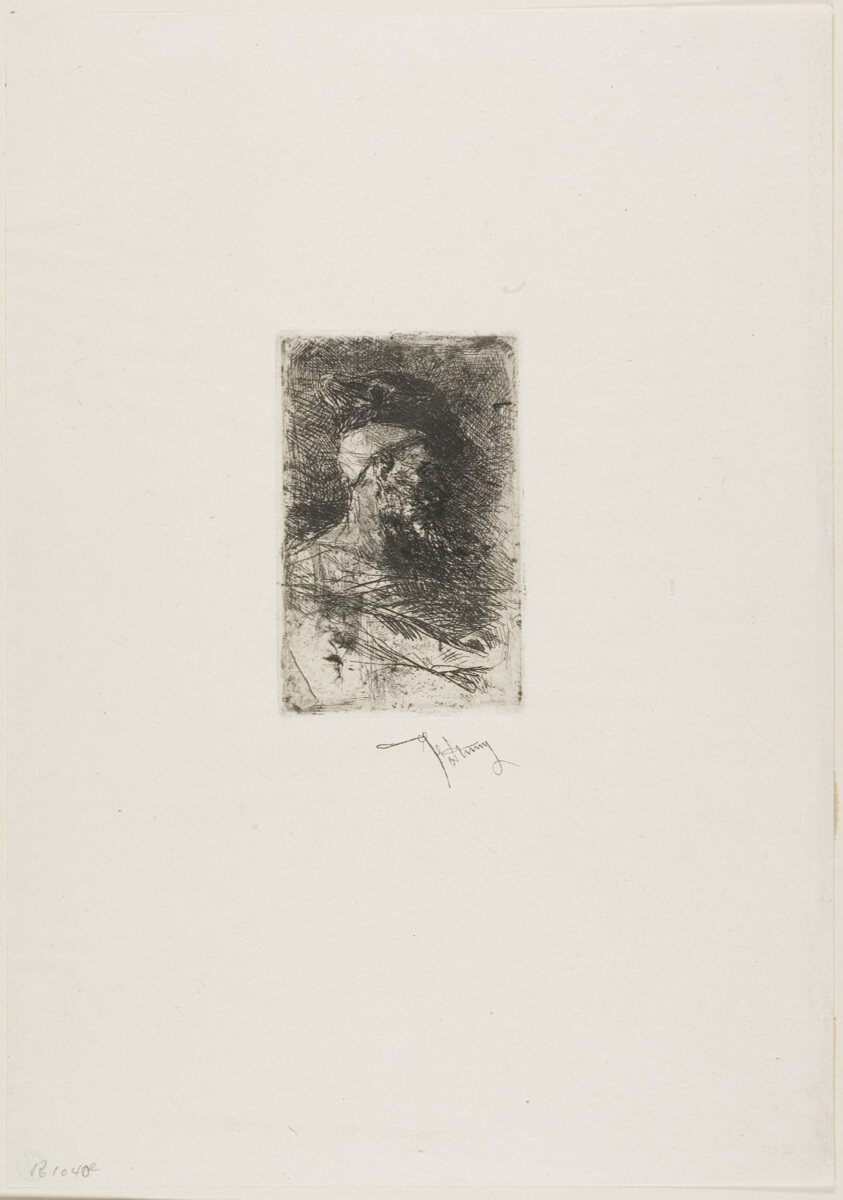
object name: Print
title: Mule Driver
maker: Mariano José María Bernardo Fortuny y Carbó; Spanish, 1838-1874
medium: Etching on paper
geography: Spain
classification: etching; print; prints and drawing